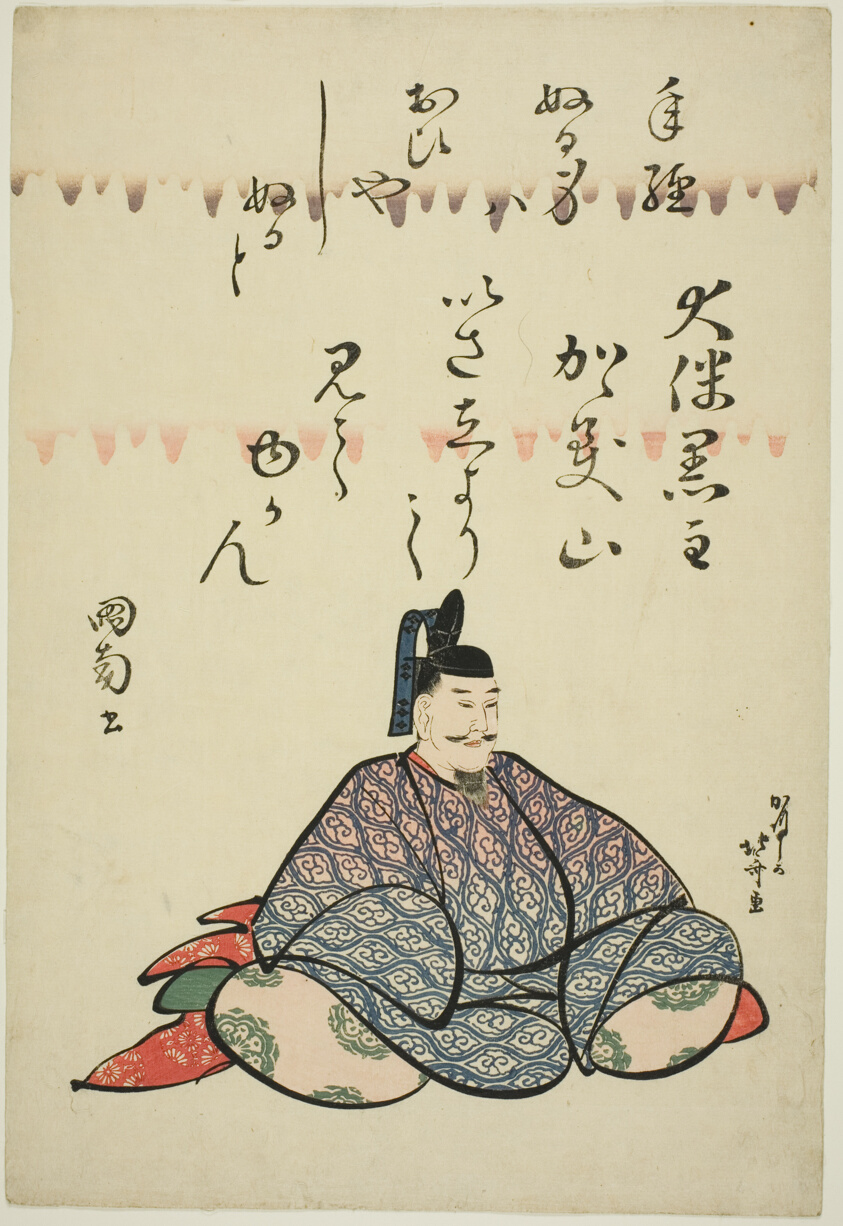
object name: Print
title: The Poet Otomo no Kuronushi, from the series Six Immortal Poets (Rokkasen)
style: Japanese (culture or style)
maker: Katsushika Hokusai 葛飾 北斎; Japanese, 1760-1849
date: c. 1810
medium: Color woodblock print; oban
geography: Japan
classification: woodblock print; print; asian art